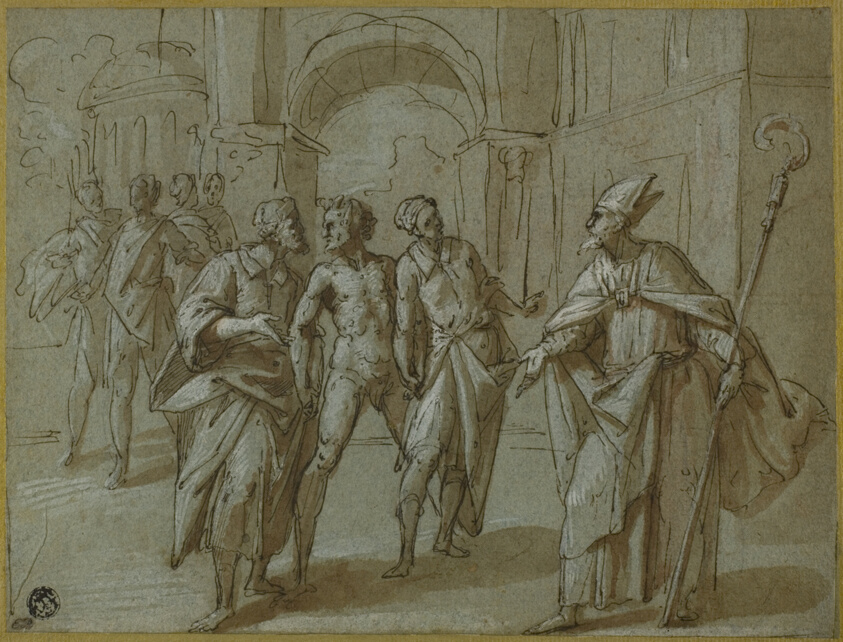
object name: Drawing and Watercolor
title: Bishop Saint (Ambrose?) Exorcising the Devil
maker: Attributed to Giovanni Battista della Rovere, called Il Fiamminghino; Italian, 1561-1627/30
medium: Pen and brown ink with brush and brown wash, heightened with lead white, over traces of black chalk, on blue laid paper, laid down on cream laid paper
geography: Italy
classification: ink with wash; drawings (visual works); prints and drawing